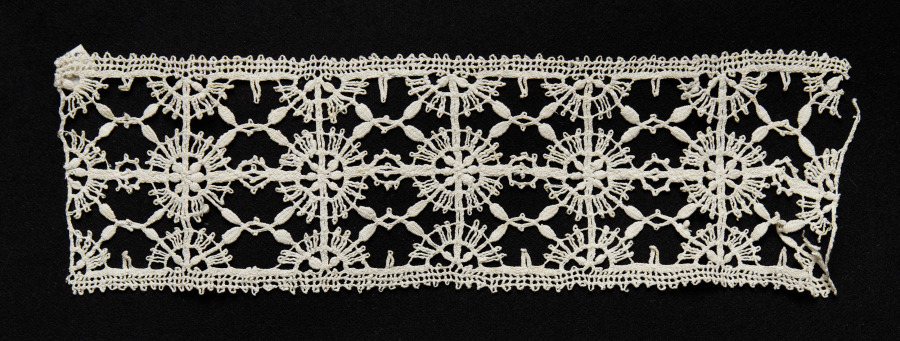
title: Lace Insertion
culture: Italy, Genoa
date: 1550–99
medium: Bobbin lace (needle lace, reticella design)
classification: Lace